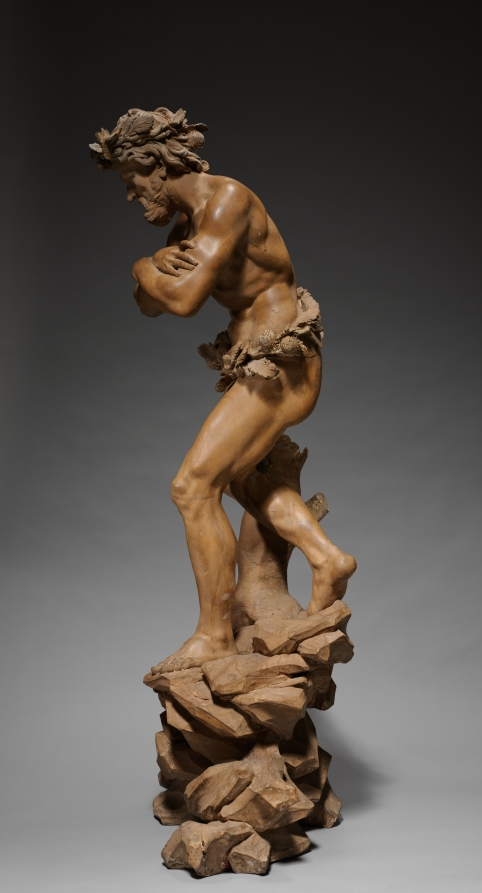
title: Winter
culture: Italy, 17th century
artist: circle of Filippo Parodi (Italian, 1630–1702)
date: c. 1700–1725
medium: wood with traces of gesso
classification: Sculpture